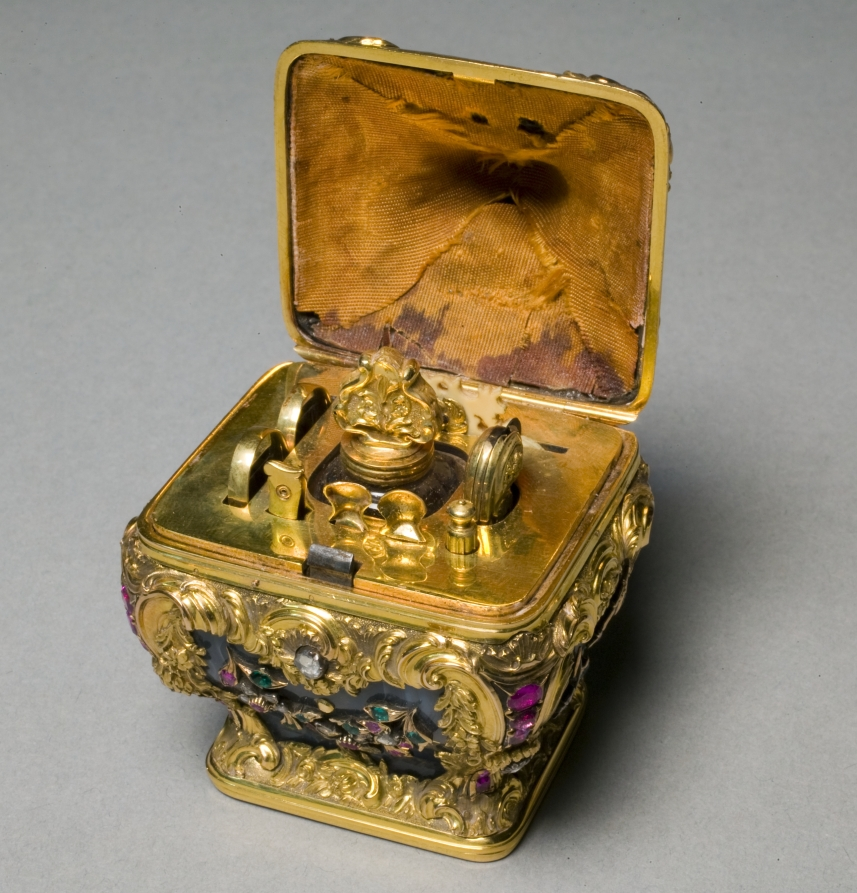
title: Snuff Box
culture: England, mid-18th century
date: c. 1750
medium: agate with gold mounts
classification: Miscellaneous